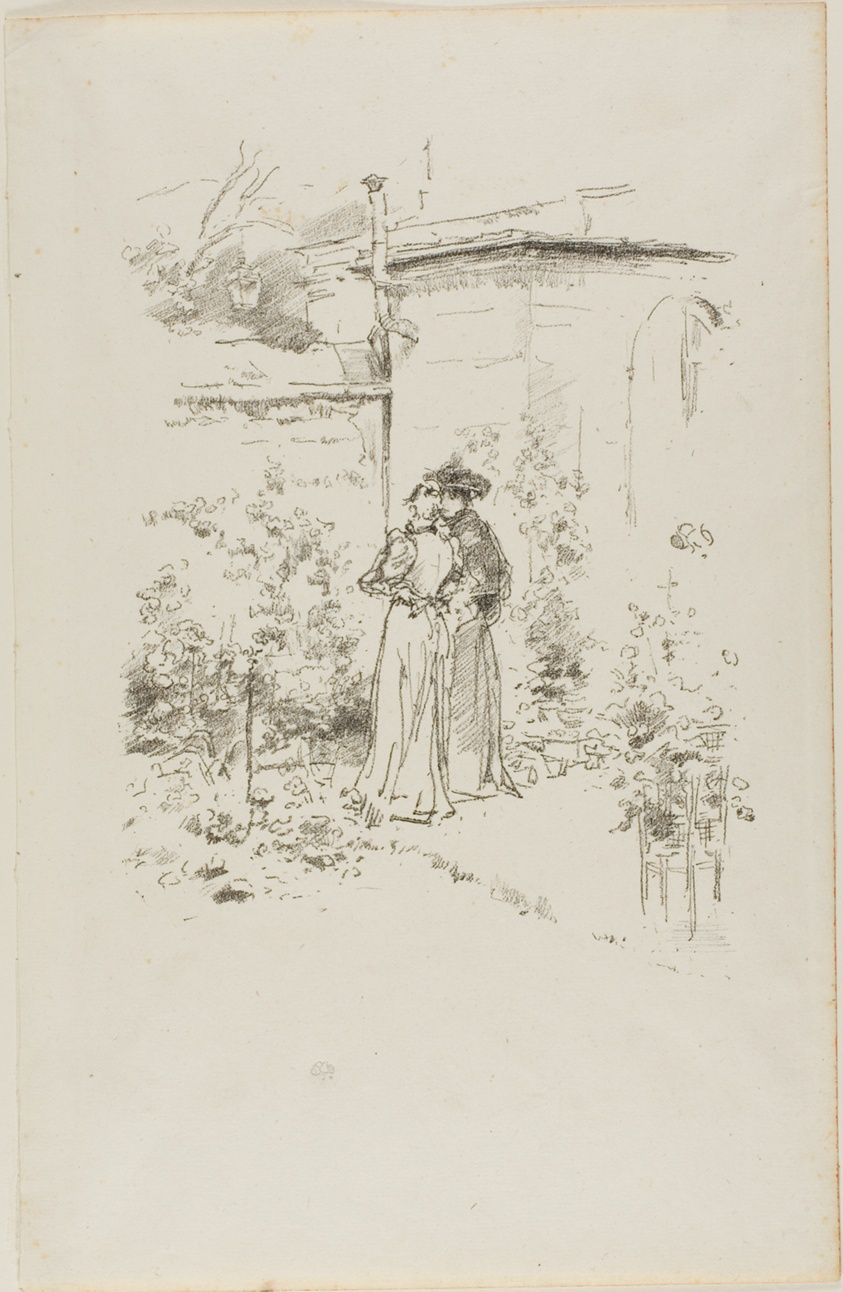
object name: Print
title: Confidences in the Garden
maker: James McNeill Whistler (American, 1834-1903)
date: 1894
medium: Transfer lithograph in black on ivory laid paper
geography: United States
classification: transfer lithograph; lithograph; print; prints and drawing; paper